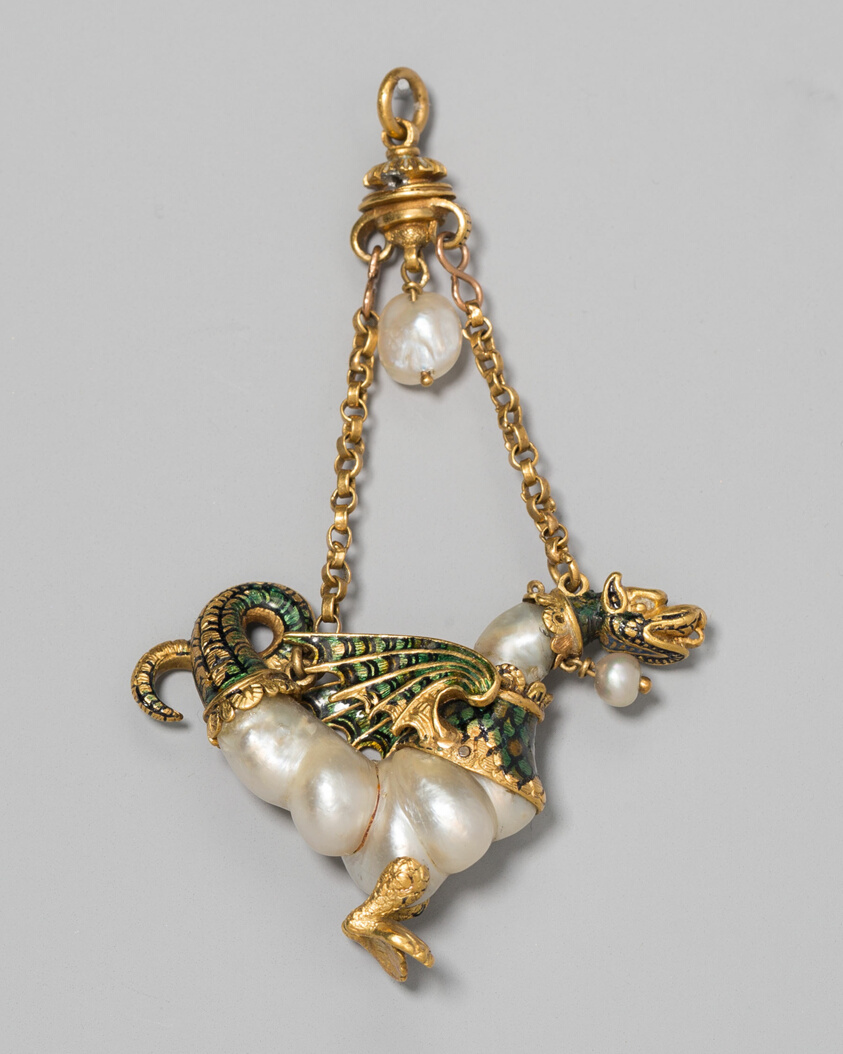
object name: Costume and Accessories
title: Pendant Shaped as a Dragon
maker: Spanish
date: c. 1575-c. 1600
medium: Gold, enamel, and baroque pearls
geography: Spain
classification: pendant (jewelry); jewelry; european decorative arts; costume